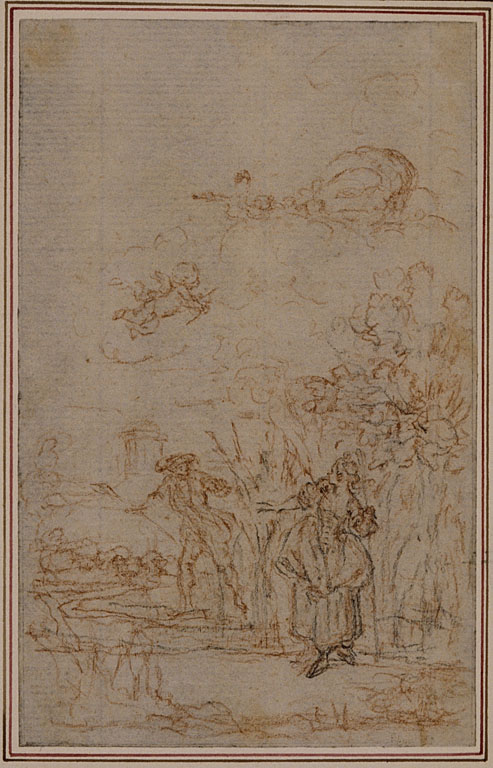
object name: Drawing and Watercolor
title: Study for Vignette in Fontenelle's (attr.) "Les Amours de Mirtil", Canto V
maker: Hubert François Gravelot (French, 1699-1773)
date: c. 1761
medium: Red and black chalk, on gray laid paper, laid down on ivory laid paper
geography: France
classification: chalk; drawings (visual works); prints and drawing